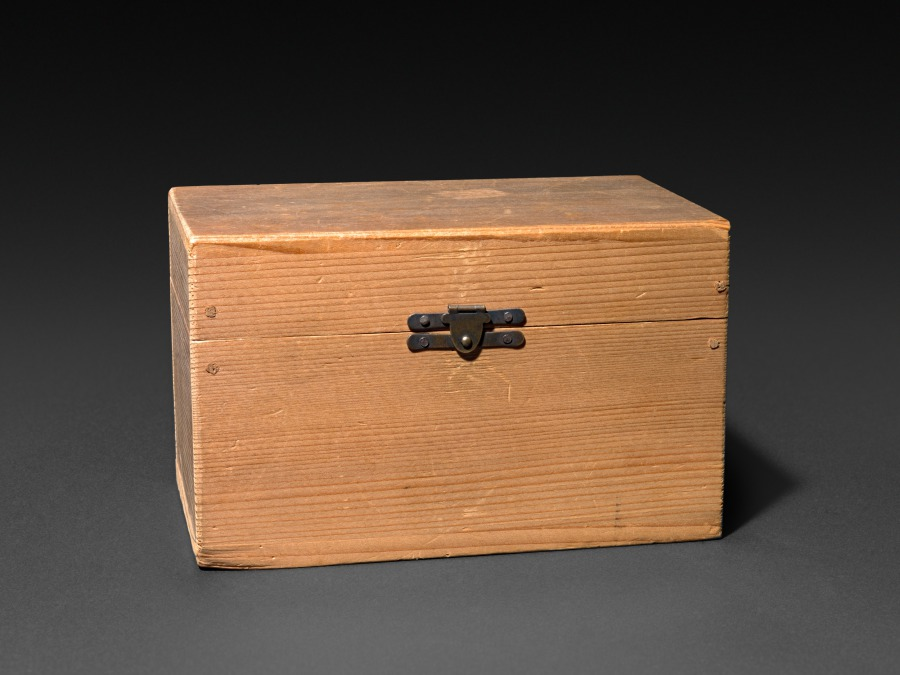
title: Vase (storage box)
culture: Japan, Meiji period (1868–1912) or Taishō period (1912–26)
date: early 1900s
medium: wood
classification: Enamel